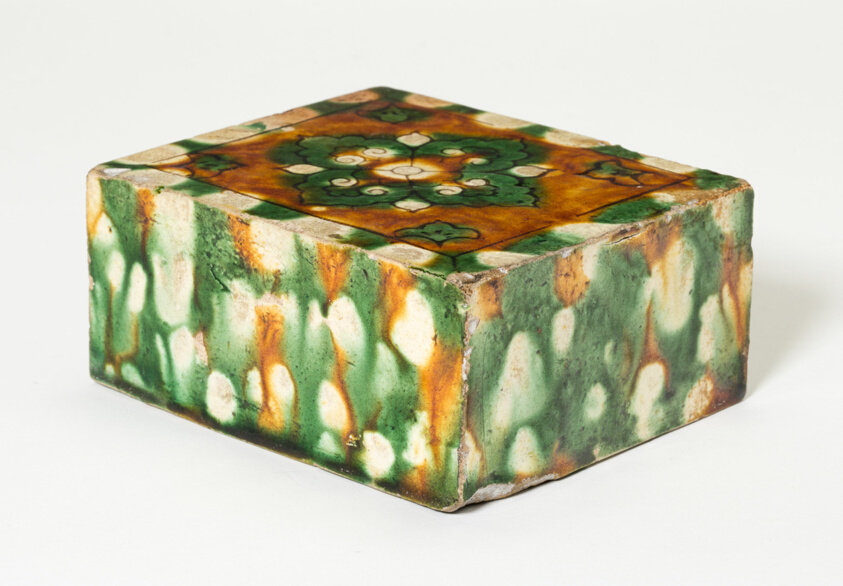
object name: Vessel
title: Rectangular Pillow with Quatrefoil Medallion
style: Chinese (culture or style)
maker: China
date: Tang dynasty (618–907), first half of 8th century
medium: Earthenware with three-color (sancai) lead glazes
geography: China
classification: earthenware; ceramics; asian art; vessel